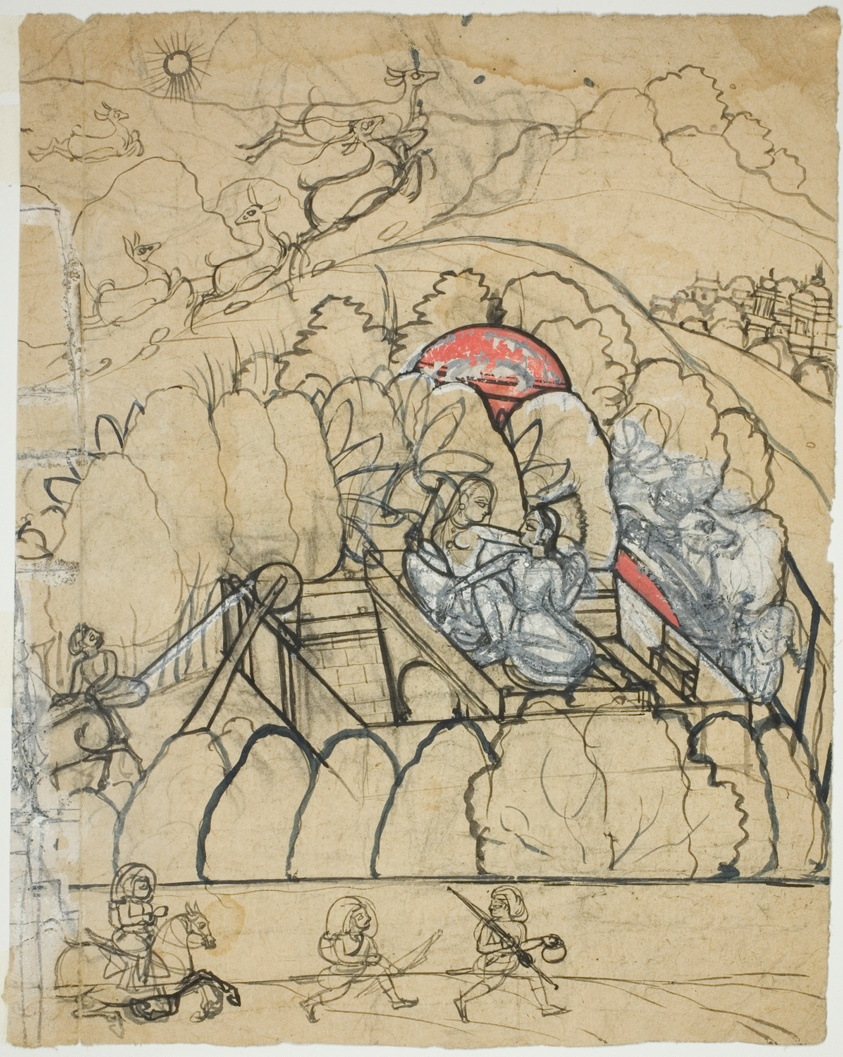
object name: Painting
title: Two Ladies Converse at a Step-Well (Baoli) in a Walled Garden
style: South Asian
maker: India; Rajasthan, Kota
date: 18th century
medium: Black ink, charcoal, and touches of color on buff paper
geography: India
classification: miniature painting; painting; asian art